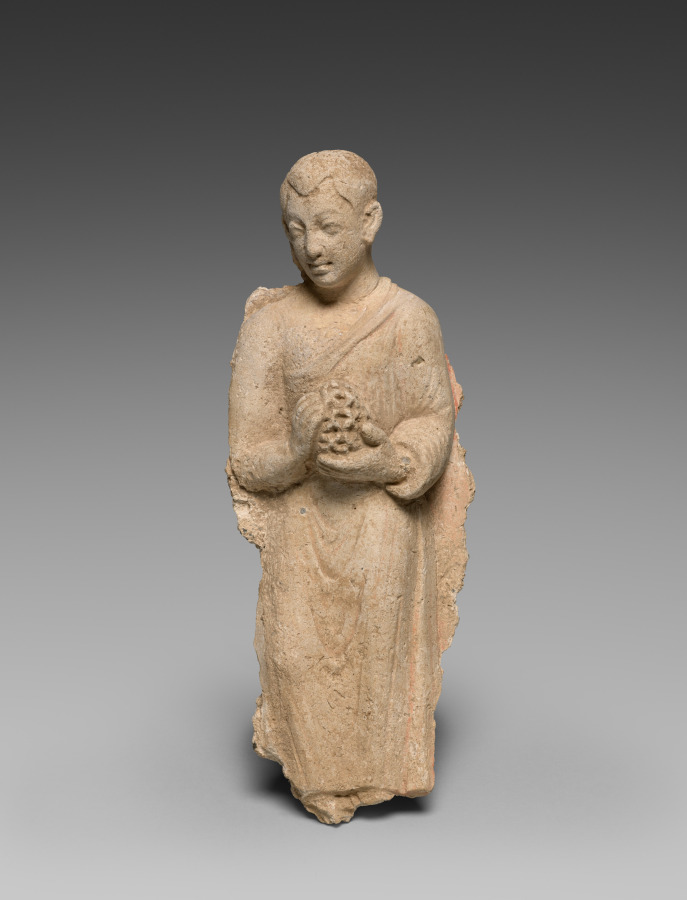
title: Monk bearing offerings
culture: Afghanistan, Hadda, probably Tape Shotor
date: c. 300 CE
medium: stucco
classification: Sculpture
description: This Buddhist monk wears a robe over one shoulder, and his hair has been shaved. He reverently brings offerings of fruit or flowers to the Buddha. Triads depicting the Buddha with attendants bringing offerings were set up on the base of monuments called stupas, in niches defined by pilasters with Corinthian-style columns indicative of the region's Hellenistic heritage.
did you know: This sculpture came from a monastery famous for preserving pieces of the Buddha's skull and robe.